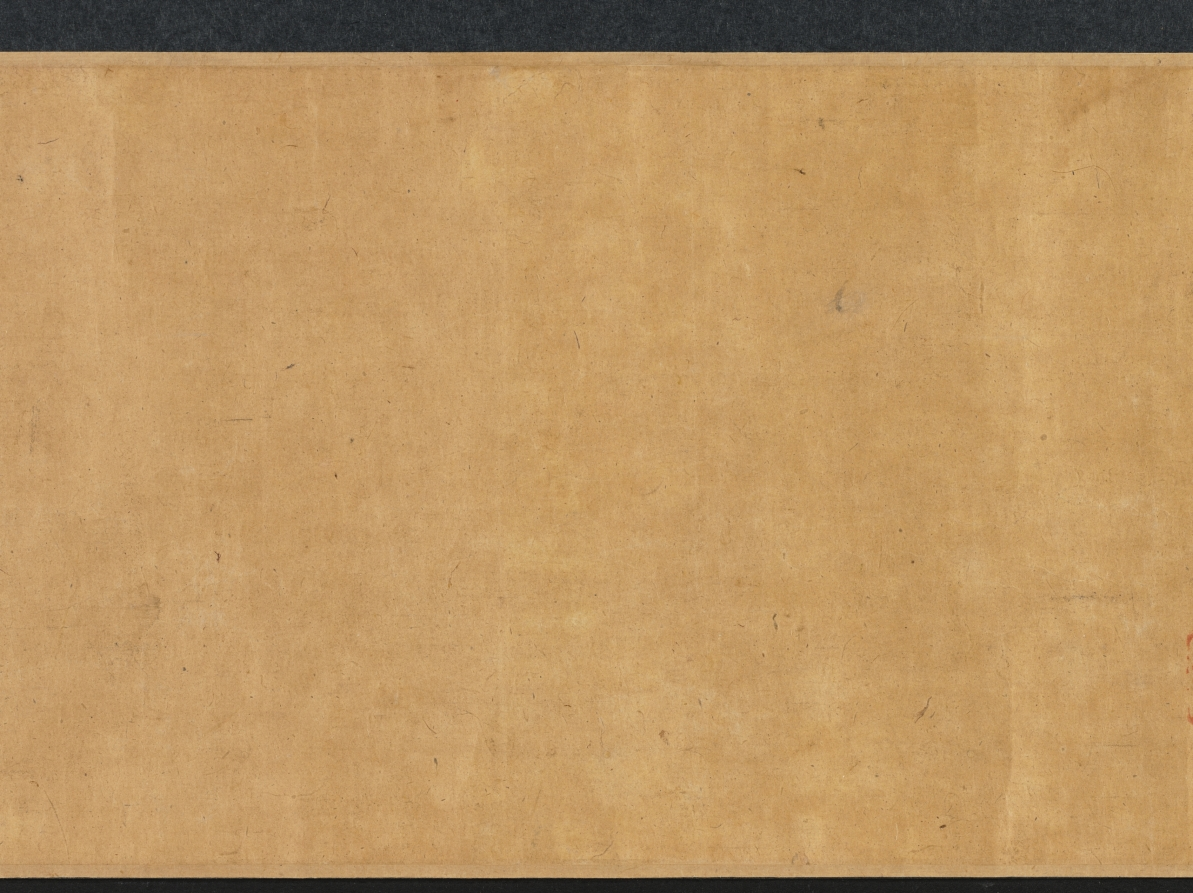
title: Zhao Mengfu Writing the Heart (Hridaya) Sutra in Exchange for Tea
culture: China, Ming dynasty (1368–1644)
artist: Qiu Ying (Chinese, 1494–1552)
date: 1542–43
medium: handscroll, ink and light color on paper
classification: Painting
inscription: Inscription accompanying text of "Heart" sutra, by Wen Zhengming 文徵明 (1470-1559): Zhengming 徵明, written in a boat at Kunshan 崑山, on the twenty-first day of the ninth month, in the renyin 壬寅 year, the twenty-first year of the Jiajing era [1542].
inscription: Colophon by Wang Shih-mou: Chou Yü-shün [Feng-lai] of K'un-shan was a scholarly, refined connoisseur of antiquities. He had acquired the poem written by Chao Ch'eng-chih [Chao Meng-fu] about the exchage of tea for Chao's calligraphy of the Prajna sutra. But the sutra itself, also written by Chao Meng-fu, is lost. He therefore asked Ch'iu Shih-fu [Ch'iu Ying] to do a painting and had Wen Cheng-ming, the artist-in-attendance, write the Hridaya Sutra in the "small, regular" style for replacement. Both works are so excellent that even Chao Meng-fu himself would certainly applaud if he should be reborn to see them. I, Shih-mou, had gotten possession of this scroll from the family of Chou Yü-shün, and since it was so wonderfully matched with one of the treasures in my collection. the Hridaya Sutra written by Chao Meng-fu for Priest Li in "running script," like the reuniting of two halves of a jade pi, I completed the scroll with the several colophons written for the "tea-exchange" poem. I did this because the painting of Ch'iu Ying and the calligraphy of Wen Cheng-ming are definitely masterpieces by themselves with absolutely no need to depend on any of the colophons written for the Chao Meng-fu poem. Furthermore, the two sons of Wen Cheng-ming, Shou-ch'eng [Wen P'eng] and Hsiu-ch'eng [Wen Chia]. have each written a colophon explaining the reason for replacing the calligraphy. As their writings are both acceptable for high standard, I didn't want to throw them away. [So by separating these into two scrolls] I was able to get two complete works of art in one clever stroke. I was quite pleased with myself, and hope that those who see this scroll shall not get suspicious because of the missing colophons. Wang Shih-mou wrote in his Jih-sun-chai study, on the first day of the tenth month, in the chia-shen year of the Wan-li era [1584].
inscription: Colophon by Wen P'eng: I-shao [Wang Hsi-chi] wrote in exchange for a flock of geese. Su Tung-po wrote in exchange for meat. Both episodes have become legends of a thousand years. Sung-hsüeh [Chao Meng-fu] "teased" Priest Kung for tea, and the story was immediately immortalized in the poems by all the famous scholars of the times. Indeed, how could one say his humor and elegance are not equal to the ancient worthies? Unfortunately, the poetry has survived but the writing of the sutra is lost. Yü-shün [Chou Feng-lai] therefore asked my father to make up the writing and so here is the complete work of art. Respectfully inscribed by Wen P'eng in the mid-summer of 1543.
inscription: Colophon by Wen Chia: Sung-hsüeh [Chao Meng-fu], in exchanging tea leaves for his writing of the Prajna, had put himself in the company of Yu-chün [Wang Hsi-chih] who exchanged geese for his writing of the Huang-t'ing sutra [the Yellow Chamber, or the Wai-ching ching, a Taoist text attributed to the Yellow Emperor]. However, was this romantic and cultivated gesture really intended for such small things? Actually, he was only proud that the excellence of his calligraphy had made him worthy to be the successor of the Ch'in Dynasty master. Since, very unfortunately, Chao Meng-fu's writing [of the Prajna] was already lost, my father therefore agreed to replace it, and did the calligraphy in the style of the Yellow Chamber. In addition, Yu-shün [Chou Feng-lai] had asked Mr. Ch'iu Shih-fu [Ch'iu Ying] to do a painting of the sutra writing story in the style of Li Lung-mien at the head of the scroll. Now it would seem the entire episode should go down in history for immortality. Respectfully recorded by Wen Chia, on the eighth day of the eighth month, in the year of k'uei-mao [1543]. trans. WKH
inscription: 4 colophons and 23 seals: 1 colophon, dated 1543, and 2 seals of Wen Peng (1498-1573); 1 colophon, dated 1543, and 2 seals of Wen Chia (1501-1583); 1 colophon, dated 1584, and 3 seals of Wang Shih-mou (1536-1588); 2 seals of Chou Feng-lai (16th c.); 3 seals of Sung Lo (1634-1713); 5 seals of the Ch'ien-lung emperor (r. 1736-95); 1 colophon, dated 1902, and 1 seal of Fei Nien-tz'u (1885-1905); 4 seals of Wan-go H. C. Weng (b. 1918); 1 seal unidentified.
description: The Yuan dynasty calligrapher Zhao Mengfu (1254–1322) is said to have transcribed the Heart Sutra for a certain priest named Li in exchange for tea. Later, during the Ming dynasty, the professional painter Qiu Ying from Suzhou painted this scene for his patron. Here, Zhao Mengfu holds a brush and has a piece of paper laid out before him. On the table is an ink stone, an ink stick, and a small water dropper. Drops of water would dissolve the ink stick into liquid ink when it was ground on the flat square stone.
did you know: Qiu Ying was born to a peasant family, but his natural talent led him to a successful career as a professional painter with wealthy patrons.